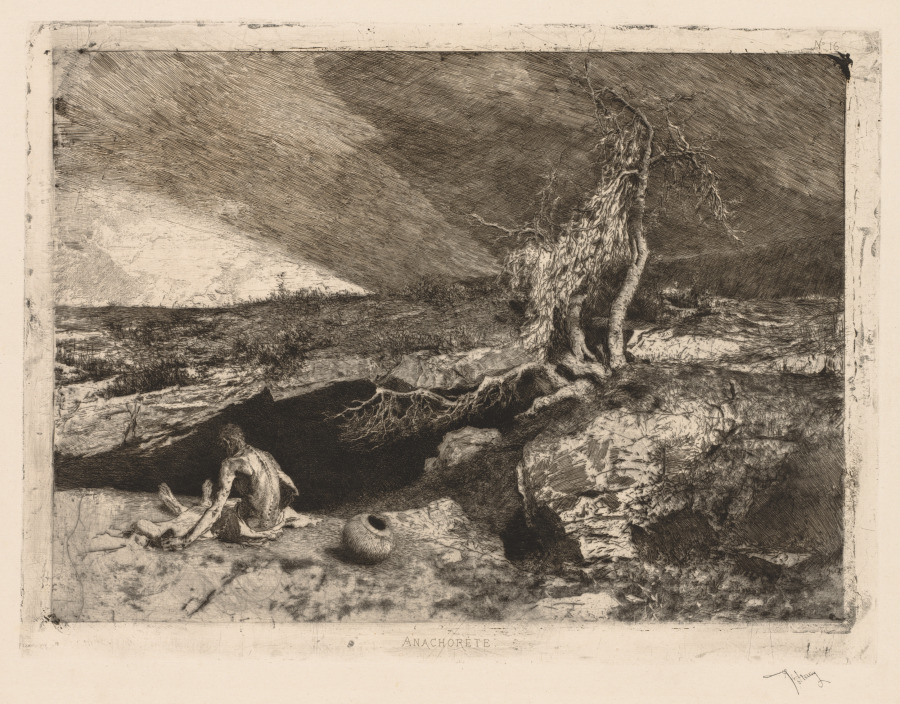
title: The Anchorite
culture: Spain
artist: Mariano Fortuny (Spanish, 1838–1874)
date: 1869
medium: etching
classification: Print